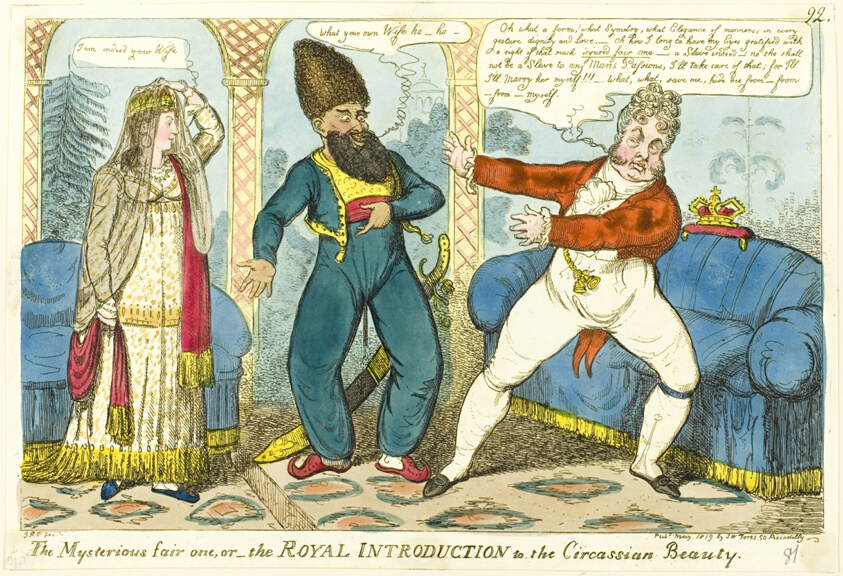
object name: Print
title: The Mysterious Fair One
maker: Isaac Robert Cruikshank (English, 1789-1856); published by S.W. Fores (English, 1761-1838)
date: published May, 1819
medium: Hand-colored etching on paper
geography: England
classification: etching; print; prints and drawing